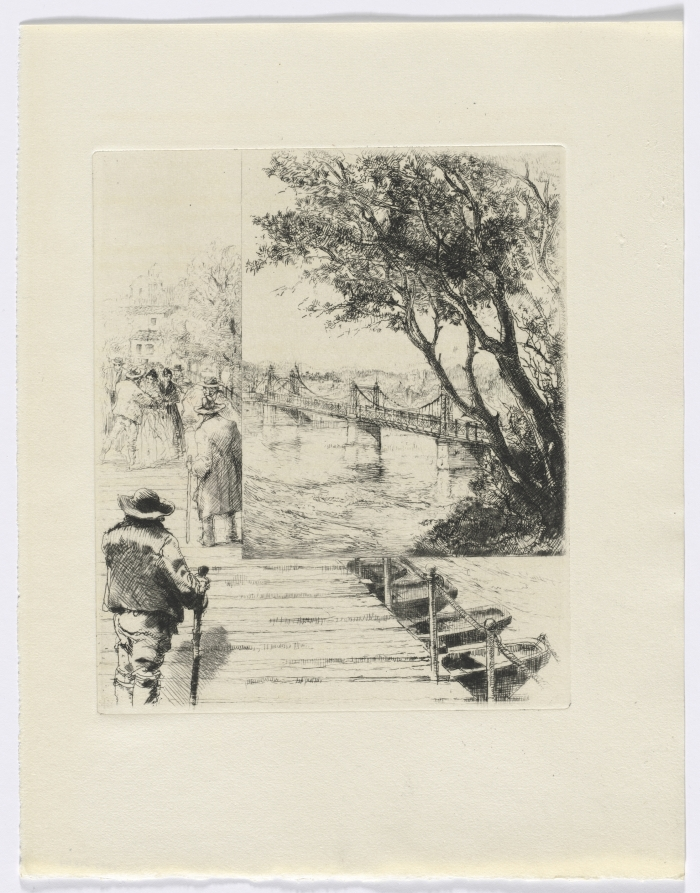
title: Frédéric Mistral: Mémoires et Recits by Frédéric Mistral: figures on a pier (insert after p.216)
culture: France, 20th century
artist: Auguste Brouet (French, 1872–1941)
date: 1937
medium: etchings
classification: Portfolio